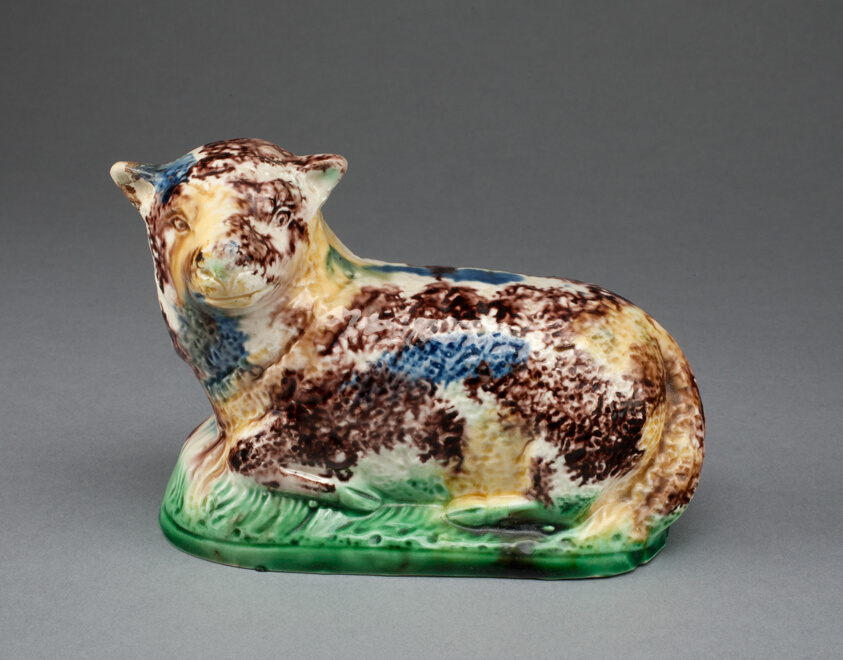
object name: Ceramics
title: Ewe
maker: Staffordshire, England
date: c. 1780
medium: Lead-glazed earthenware (creamware)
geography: Staffordshire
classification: earthenware; creamware; ceramics; european decorative arts; lead-glazed earthenware